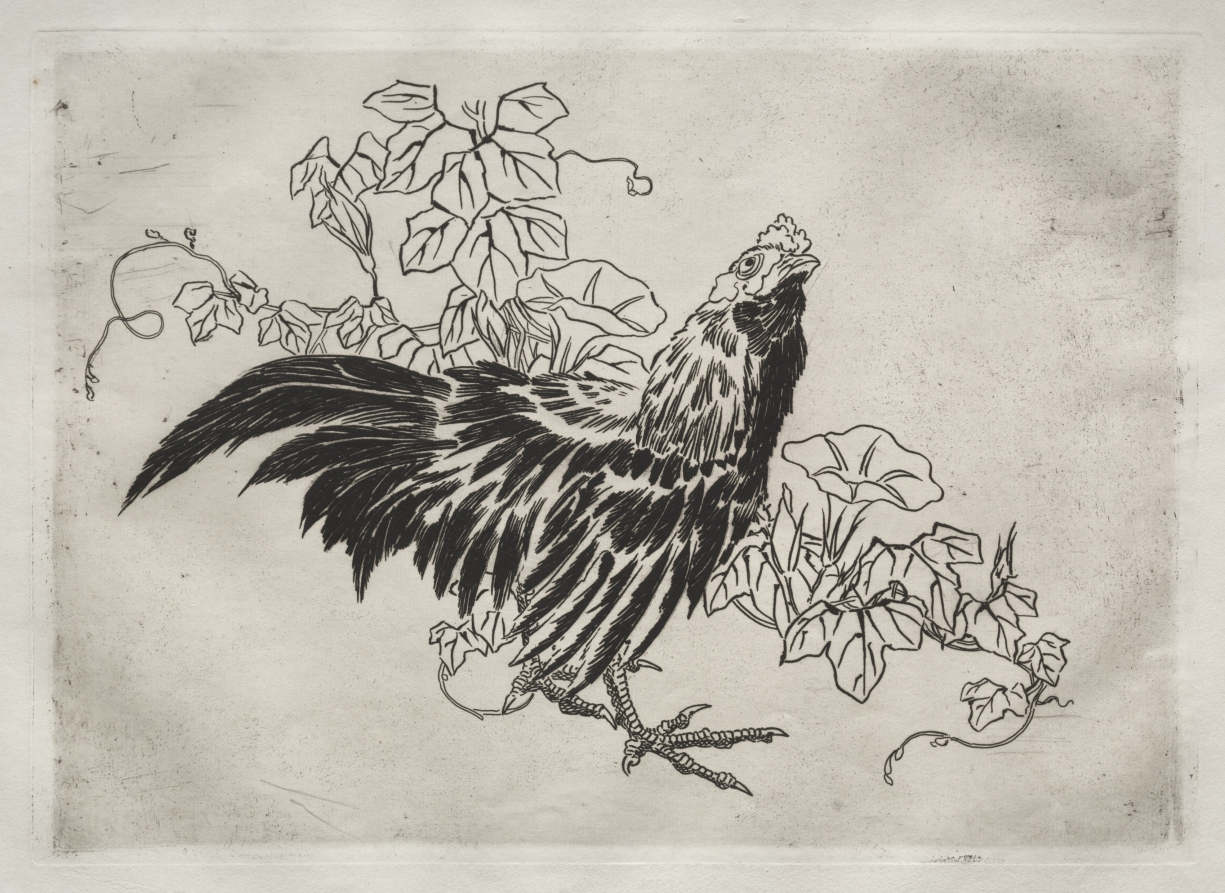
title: Dinner Service (Rousseau service): Rooster and morning glories (no. 25)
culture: France, 19th century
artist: Félix Bracquemond (French, 1833–1914)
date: 1866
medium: etching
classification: Print